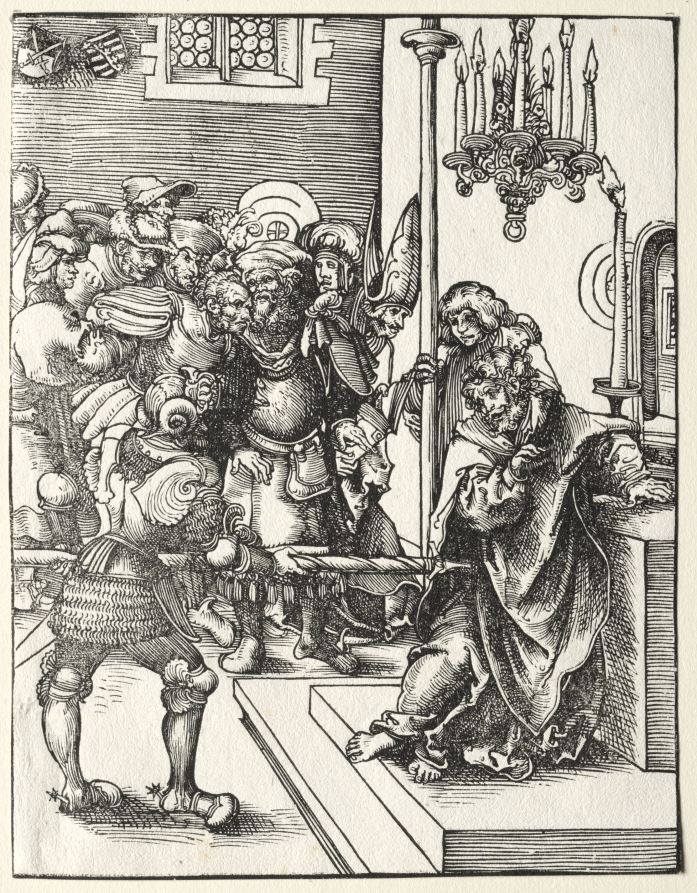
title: Martyrdom of St. Thomas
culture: Germany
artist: Lucas Cranach (German, 1472–1553)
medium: woodcut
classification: Print